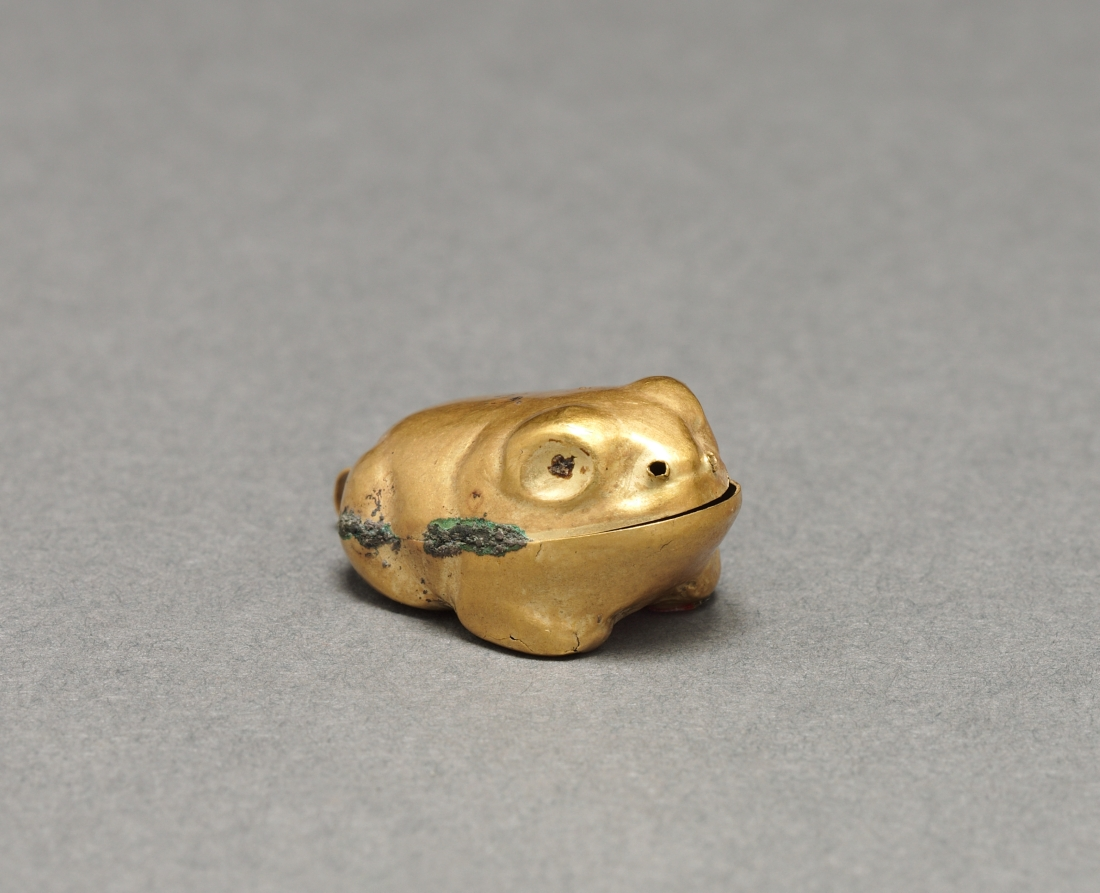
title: Frog Pendant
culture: Peru, Moche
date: 200–700 CE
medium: gold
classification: Metalwork